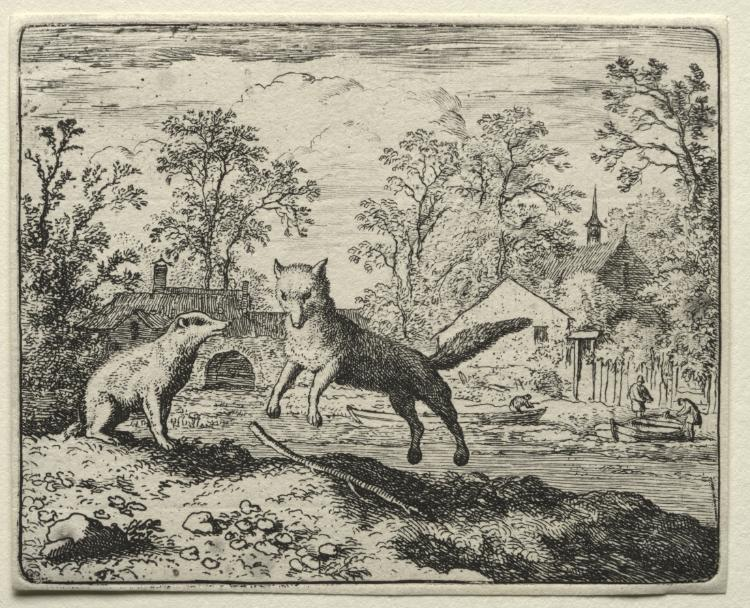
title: Reynard the Fox: Reynard Doing Penance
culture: Netherlands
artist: Allart van Everdingen (Dutch, 1621–1675)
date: 1650–75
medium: etching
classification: Print